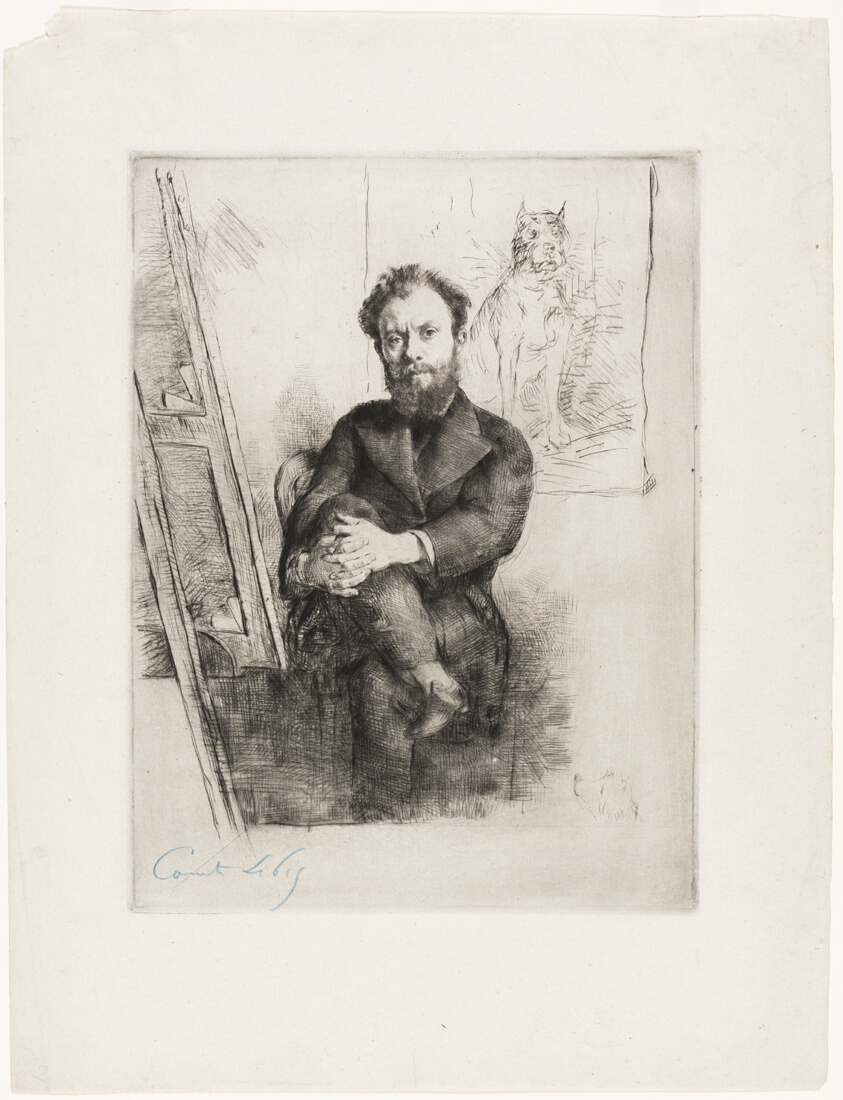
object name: Print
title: Portrait of Vicomte Ludovic Napoléon Lepic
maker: Marcellin Gilbert Desboutin (French, 1823-1902)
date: 1876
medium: Drypoint on ivory laid paper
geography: France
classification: drypoint; print; prints and drawing